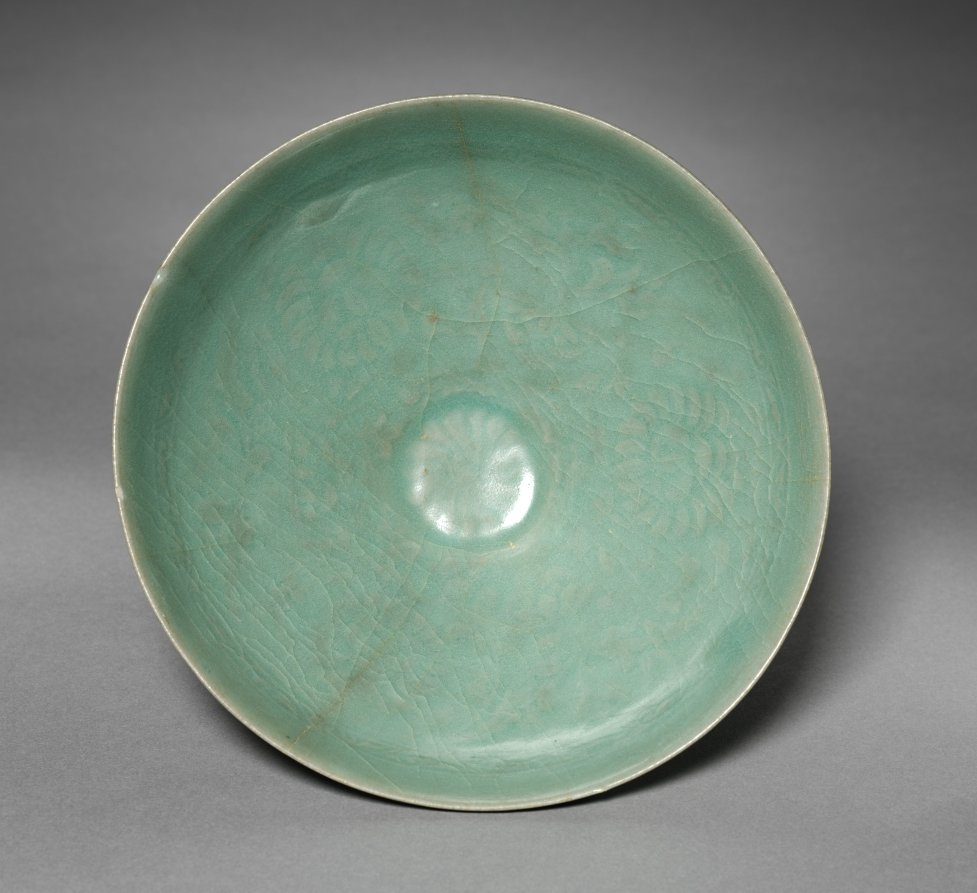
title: Bowl with Flowering Vines Design in Relief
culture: Korea, Goryeo dynasty (918–1392)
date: 1100s-1200s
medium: celadon ware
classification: Ceramic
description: As early as the 600s, the practice of drinking tea and wine became an important part of elite leisure culture in Korea. A wide bowl like this example was especially suitable for drinking powdered tea shaved from a compressed tea cake, the most commonly enjoyed type during the Goryeo period. The image of flowering vines in relief on the inner wall of this tea bowl must have made the moment of drinking tea more enjoyable.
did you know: This type of celadon bowl was modeled after Ru ware of northern China. Xu Jing (1091–1153), the Chinese official who visited Korea in 1123, called the Korean celadon ware as the “new kiln ware of Ru-zhou.”